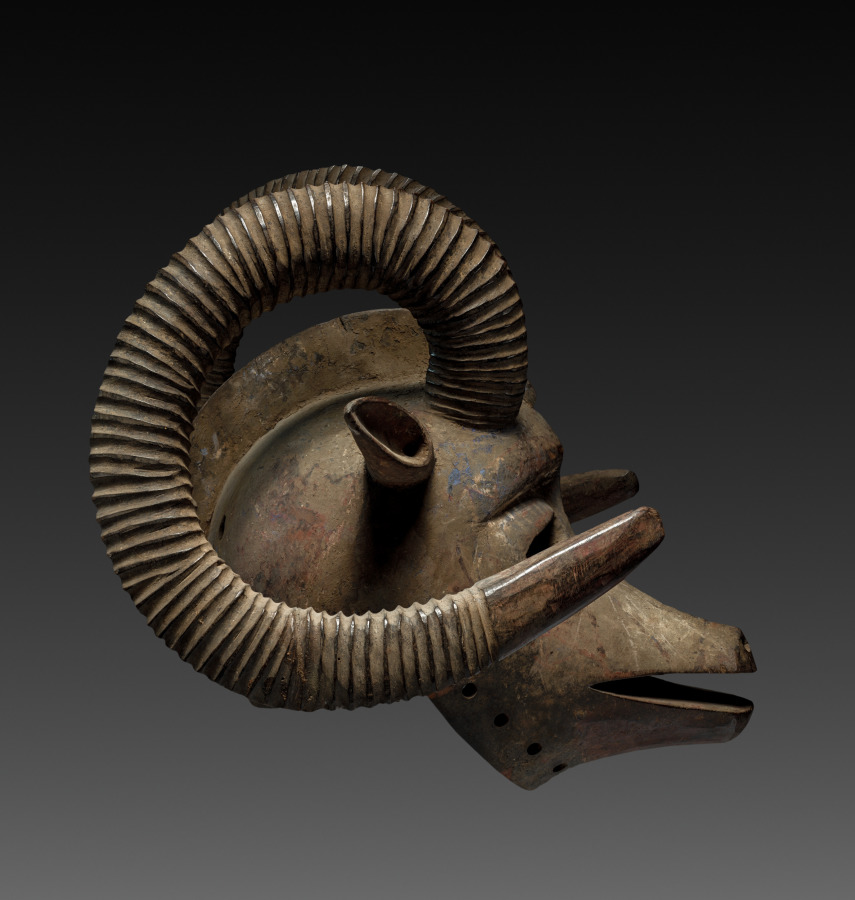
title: Ram Mask (Bolo)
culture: Africa, West Africa, Burkina Faso, Bobo-style blacksmith-carver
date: possibly early 1900s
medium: Wood and paint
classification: Mask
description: Bolo masks are primarily danced for entertainment during communal occasions like funerals, male initiations, and harvest celebrations. Comprising both animal and human features, the mask––always worn by a male dancer––refers to the cultural significance of the ram, an animal associated with male aggression across sub-Saharan Africa.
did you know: The mask was vividly painted while in use. Look closely at its surface to see traces of blue, red, and white paint.